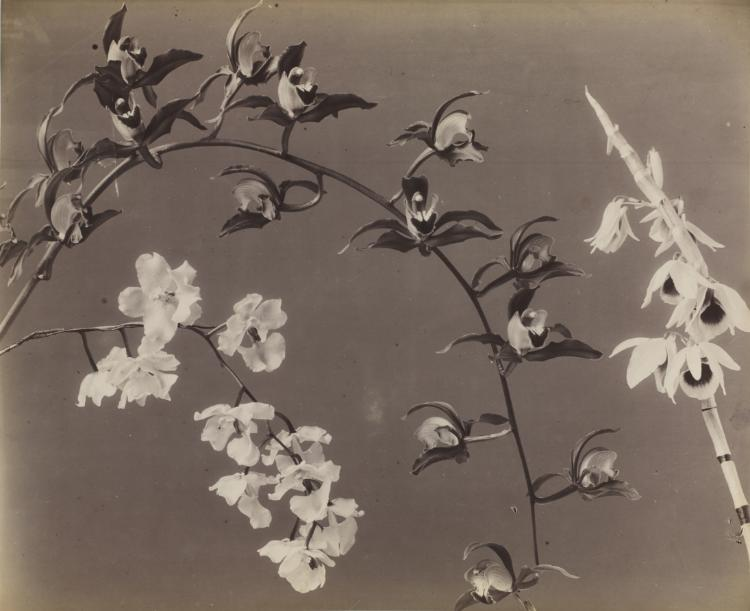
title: Study of Orchids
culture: France, 19th century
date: c. 1870s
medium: albumen print from wet collodion negative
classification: Photograph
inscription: Written in pencil on recto of mount: "12 [D?] / 6"; "I 109"